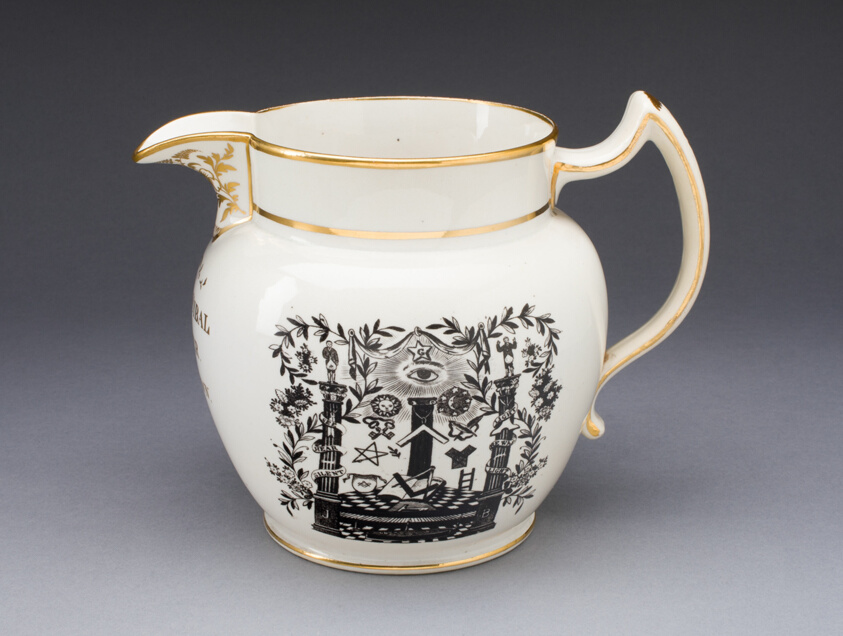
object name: Ceramics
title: Jug with Masonic Iconography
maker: Manufacturer: Spode Pottery & Porcelain Factory; English, founded 1776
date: 1824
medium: Earthenware with transfer-printed decoration and gilding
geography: Stoke on Trent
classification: pitcher (vessel); tableware; vessel; porcelain; european decorative arts; ceramics